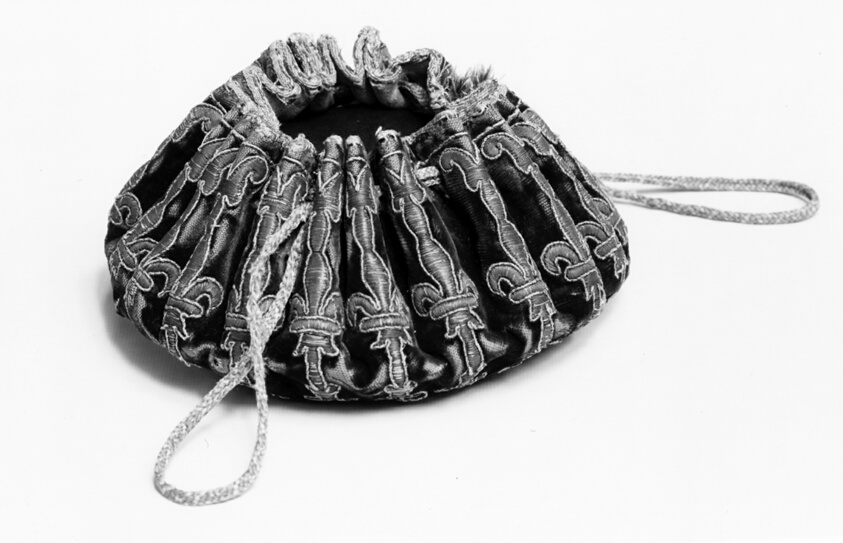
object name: Costume and Accessories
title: Gaming Bag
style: 18th Century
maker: France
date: 1675/1700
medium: Silk, broken warp-chevron twill weave with supplementary pile warps forming cut solid pile; embroidered with silk and gilt-metal-strip-wrapped silk in laid work, couching, and padded couching; over leather; edged with silk, plain weave tape; drawstring of silk, oblique interlacing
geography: France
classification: textile; needlework (visual works); costume